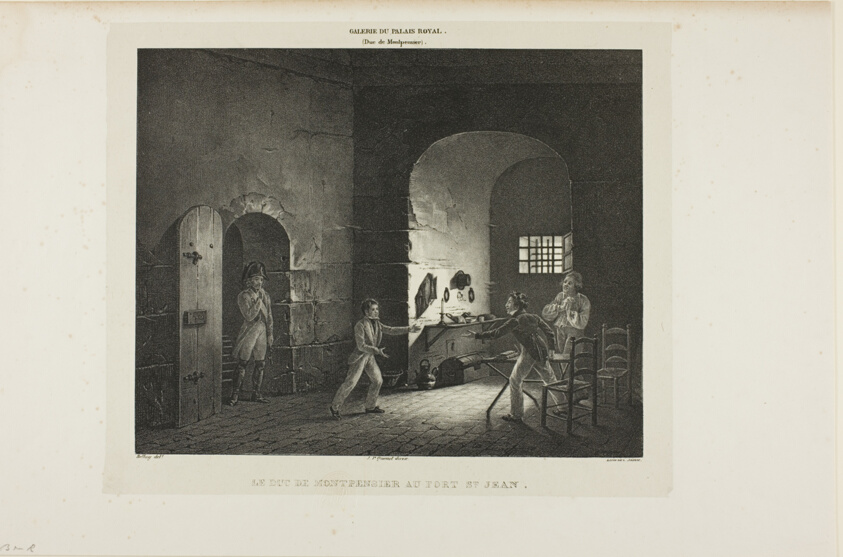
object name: Print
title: The Duc de Montpensier at Fort St. Jean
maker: François Bellay (French, 1790-c. 1854); printed by Charles Étienne Pierre Motte (French, 1785-1836); published by Antoine Philippe d' Orleans (French 1775-1807)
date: 1824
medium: Lithograph in black on gray chine laid down on ivory wove paper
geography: France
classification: lithograph; print; prints and drawing